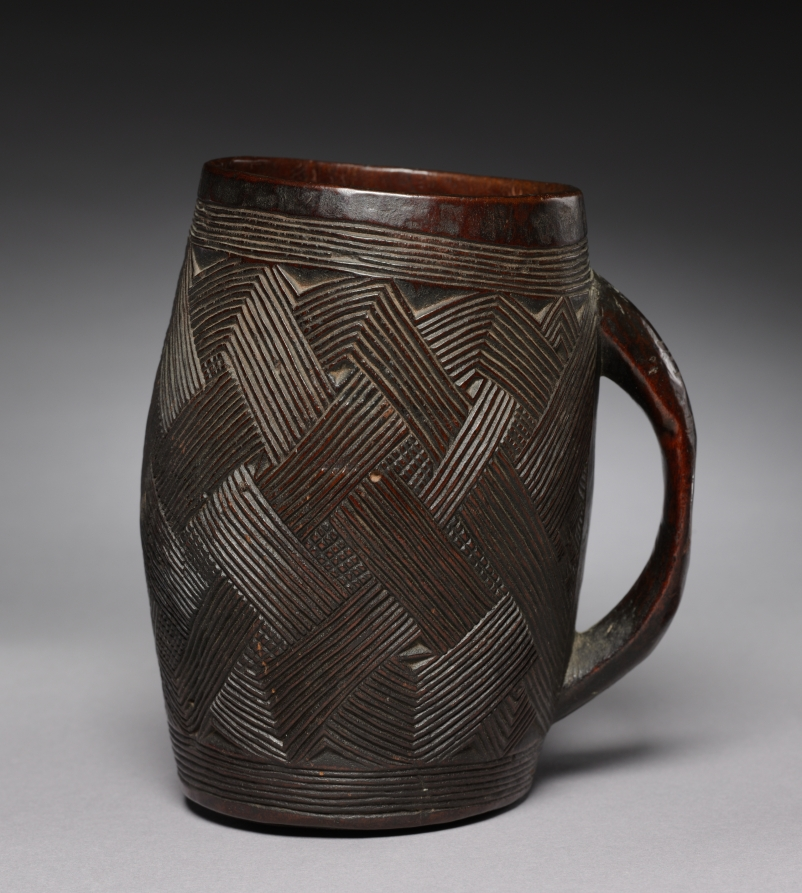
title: Cup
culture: Democratic Republic of the Congo, Kuba, 20th century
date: 1900s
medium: Wood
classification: Vessels